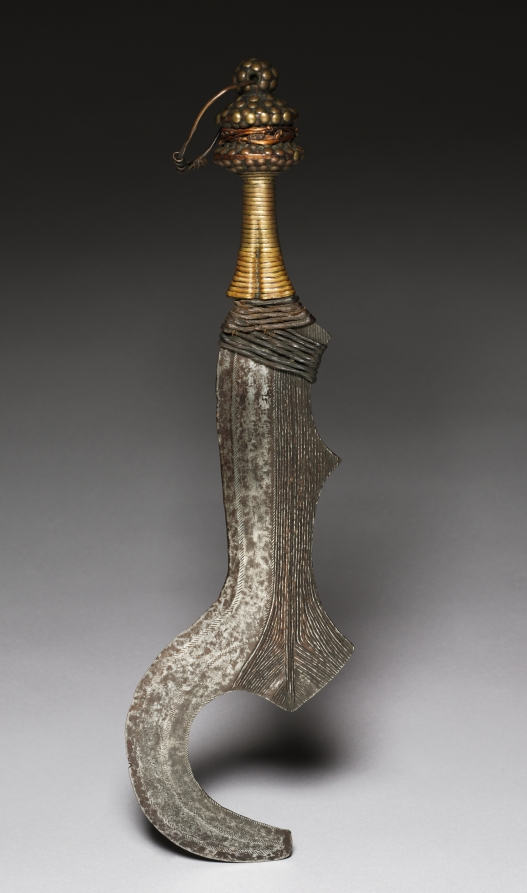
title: Knife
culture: Africa, Central Africa, Democratic Republic of Congo, Bangala-style maker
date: c. 1900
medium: Iron, wood, copper alloy, upholstery studs, plant fibers, and rawhide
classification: Arms and Armor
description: This beautifully wrought knife served as a symbol of political authority among the Ngala. Quite literally it signified the power of life and death for its form was derived from that of an executioner's knife.